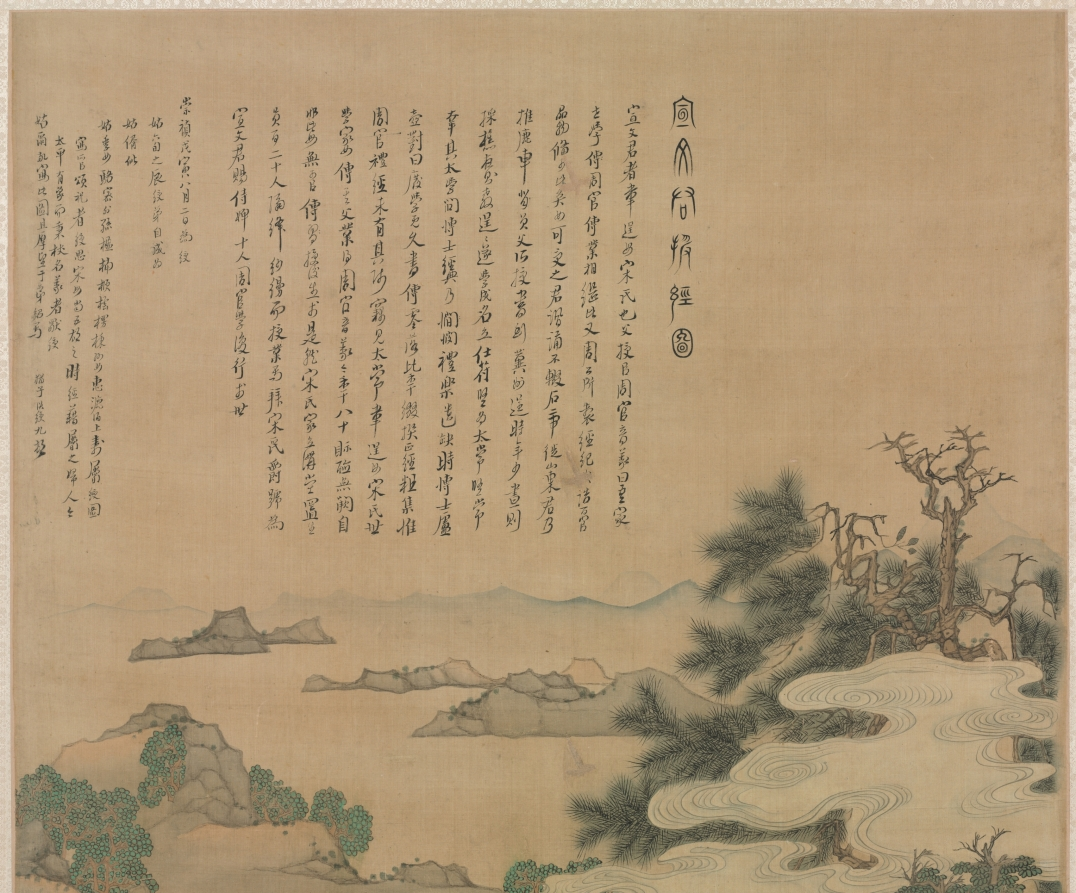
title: Lady Xuanwen Giving Instruction on the Rites of Zhou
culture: China, Ming dynasty (1368–1644)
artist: Chen Hongshou (Chinese, 1598/99–1652)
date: 1638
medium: Hanging scroll; ink and color on silk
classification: Painting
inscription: 宣文君者韋逞母宋氏也。父授以周官音義，曰：吾家世學傳周官。傳業相繼。此又周公所製，經紀〔典〕誥百官品物備於此矣。女可受之。君諷誦不輟。石帝徙山東。君乃推鹿車，背負父所授書到冀州。逞時年少。晝則採樵，夜則教逞。逞遂學成名立。仕符堅為太常。堅常幸其太學，問博士經典。乃憫禮樂遺缺。時博士盧壺對曰：廢學既久，書傳零落。比年綴撰，正經粗集。惟周官、禮經，未有其師。竊見太常韋逞母宋氏世學家，女傳其父業。得周官音義。今年八十。視聽無闕。非此母無可傳授後生。于是就宋氏家立講堂，置生員百二十人。隔絳紗縵而授業焉。拜宋氏爵，號為宣文君。賜侍婢十人。周官學後行于世。 崇禎戊寅八月二日，為綬姑六旬之辰。綬弟自成為姑偦。偕姑季女駱密、外孫楹、楠、楩、橒、楞、棅、孫女惠、漉酒上壽，屬綬圖寫，所以頌祝者。綬思宋母尚五胡之時，經藉屬之婦人；今太平有象，而秉杖名義者，獨綬姑爾。敬寫此圖，且厚望于弟紹焉。猶子洪綬九頓首。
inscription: 5 additional seals: 2 of Xu Weiren 徐渭仁(1788－1855); 2 of Sun Zutong 孫祖同 (1894–1937); 1 of C. C. Wang 王季遷 (1907–2003).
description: This painting by Chen Hongshou depicts the story of Xuanwen Jun, or Lady of Literary Propagation, at a venerable age, instructing young scholars on the Confucian classics. It was painted for Chen’s aunt in celebration of her 60th birthday. Chen’s painting style is archaic in the use of fine outlines and brilliant coloring with mineral pigments. In depicting the figures, he uses the “iron-wire” brush style (fine, even lines) with deliberate control. The faces are elongated and exaggerated. A few ritual bronzes lend the scene an antique flavor.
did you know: Chen Hongshou's long inscription at the top of the painting compares his virtuous aunt with the historical exemplar, Lady Xuanwen.